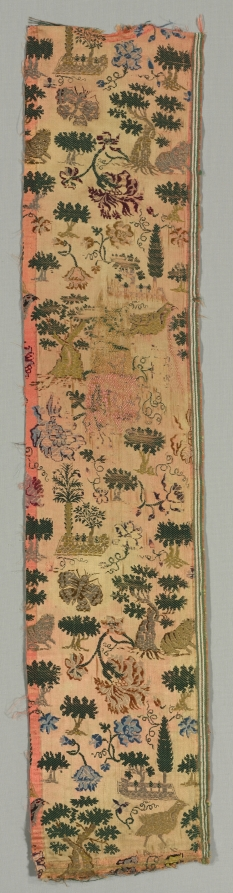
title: Fragment of Brocaded Silk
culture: Spain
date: 1700s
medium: satin, brocaded; silk and metal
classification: Textile